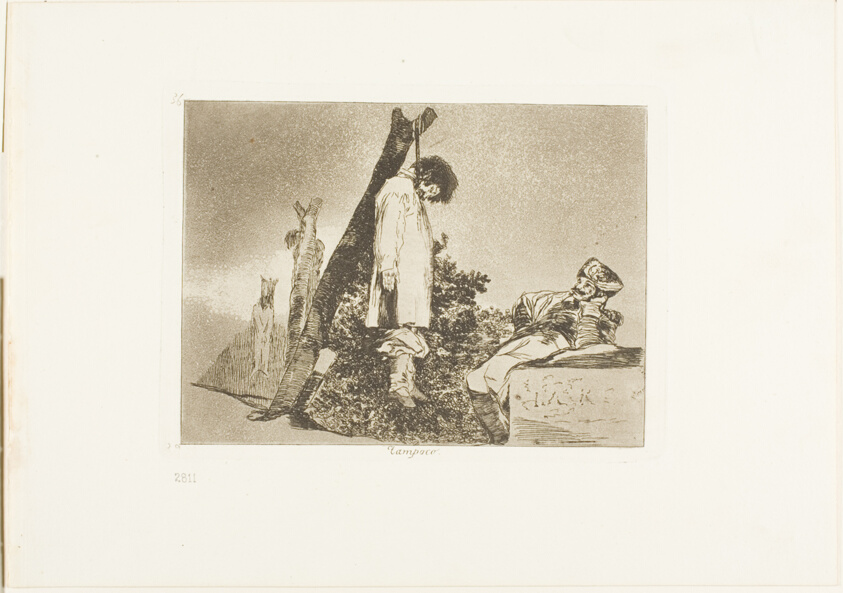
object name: Print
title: Not in this case, plate 36 from The Disasters of War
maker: Francisco José de Goya y Lucientes (Spanish, 1746-1828)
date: 1812/15, published 1863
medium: Etching, burnished aquatint, drypoint, burin and burnishing on ivory wove paper with gilt edges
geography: Spain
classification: etching; print; prints and drawing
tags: war